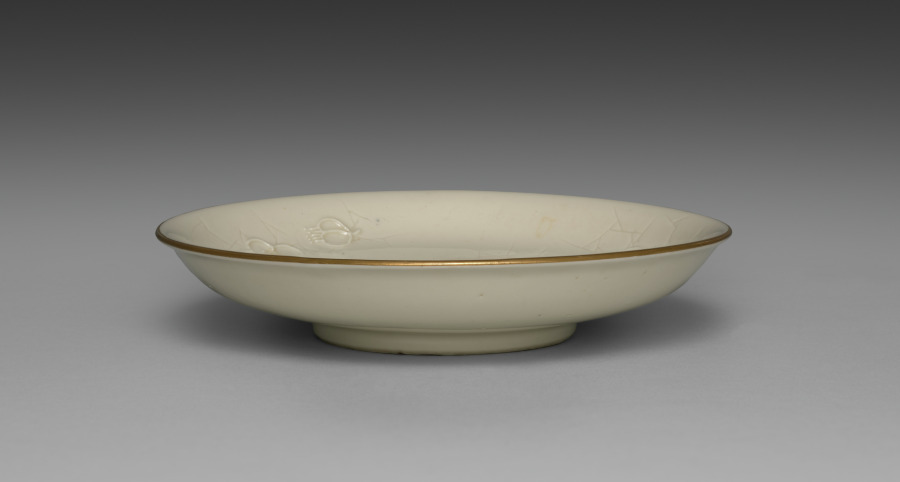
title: Medium-sized Dish from Dining Set with Plum Blossoms and Cracked-Ice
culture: Japan, Meiji period (1868–1912)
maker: Seifū Yohei II (Japanese, 1844–1878)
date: c. 1875–78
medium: Porcelain with molded designs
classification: Ceramic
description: Each item in this set has a delicate low-relief design of flowering plum branches over scattered, intersecting lines meant to resemble the cracked-ice surface of a frozen body of water and is signed on the base in gold pigment. While Yohei II produced many fine works in underglaze blue, like those produced by Kiyomizu Shichibei, he also made works in quite different styles later in his career, from the early 1870 s. In 1873, he was appointed purveyor to the Industrial Center of Kyoto Prefecture, a designation associated with Kyoto’s efforts to reach an international market through the port of Kobe; and from 1875 until his death, he was involved in national-level projects to present Japanese ceramics across the world. It was during this period that Yohei III was apprenticed to Yohei II, and it has been suggested that this set may in fact be an early example of Yohei III’s work, which he signed with his teacher’s name. Decorated with flowers resembling Japanese textile motifs, the set calls to mind the design of Yohei II’s pair of vases with plum blossoms in the Victoria and Albert Museum. Here, the elaborate trees created for a formal public exhibition setting have been translated into the approachable blossoms of the genteel domestic environment. While the designs are consistent across the pieces, each raised flower petal and pistil and each incised line in the ice was done by hand, so the cups, bowls, and dishes are similar yet unique. The bottoms of two boxes once identified the set’s owner, but the information has been deliberately obscured with black ink. However, inscriptions still visible appear to indicate two occasions, once at the end of July 1886 , and once again in June 1916 , when parts of the set were requested from Hokura in Niigata Prefecture. The location corresponds to a neighborhood in the present-day city of Jōetsu. The surname Tsuji 辻 also appears on a paper tag affixed to one of the box cloths. Future research may possibly reveal more about their provenance. A vase by Yohei III in a private collection combines the formal grandeur of the Yohei II vases in the Victoria and Albert Museum with the gentler design of this dining set, placing flowering plum trees against soft, scalloped-edge clouds resembling those in golden screens.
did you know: The dining wares have a creamy white coloration that the four boxes containing them identify as Korean in style.